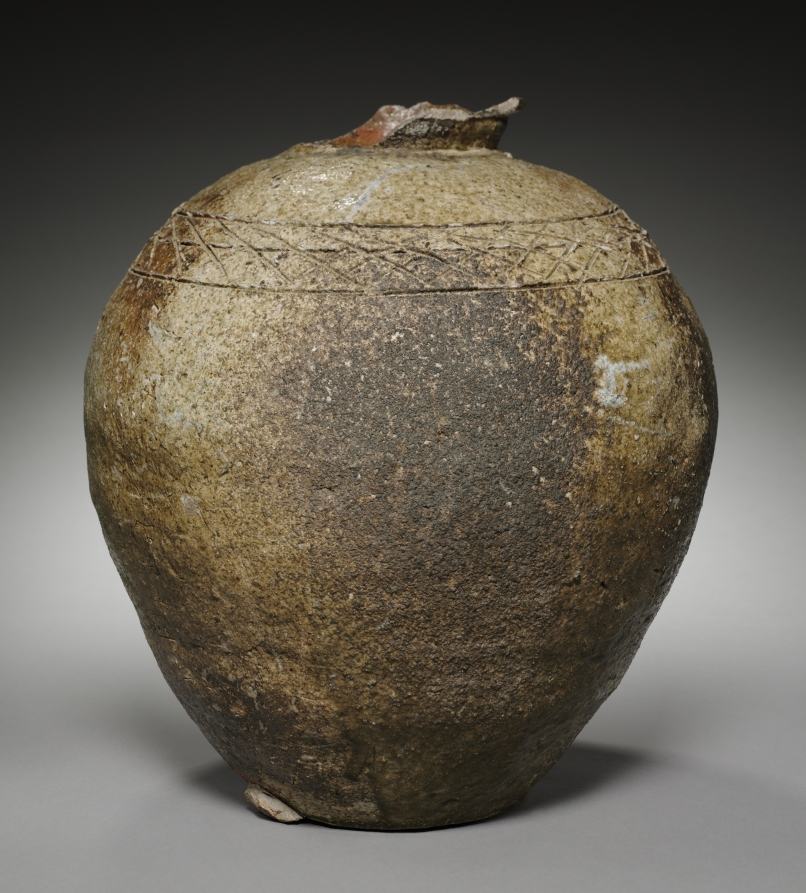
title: Storage Jar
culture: Japan, Muromachi period (1392–1573)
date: late 1300s–1400s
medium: Stoneware with natural ash glaze (Shigaraki ware)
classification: Ceramic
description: The red color of this jar comes from iron in the clay. Natural ash glaze settled on the vessel during firing. The rim would have been complete with a slightly flared lip. Around the collar is an incised pattern resembling cypress fences, a common scene in the Japanese landscape. Intended for grain storage, rustic vessels like this one were also prized by tea enthusiasts, who appreciated the uncalculated beauty of the glaze and the asymmetry of these humble vessels.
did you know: This jar was probably made using a coiling method, where coils of clay are stacked atop each other and smoothed to form its structure.